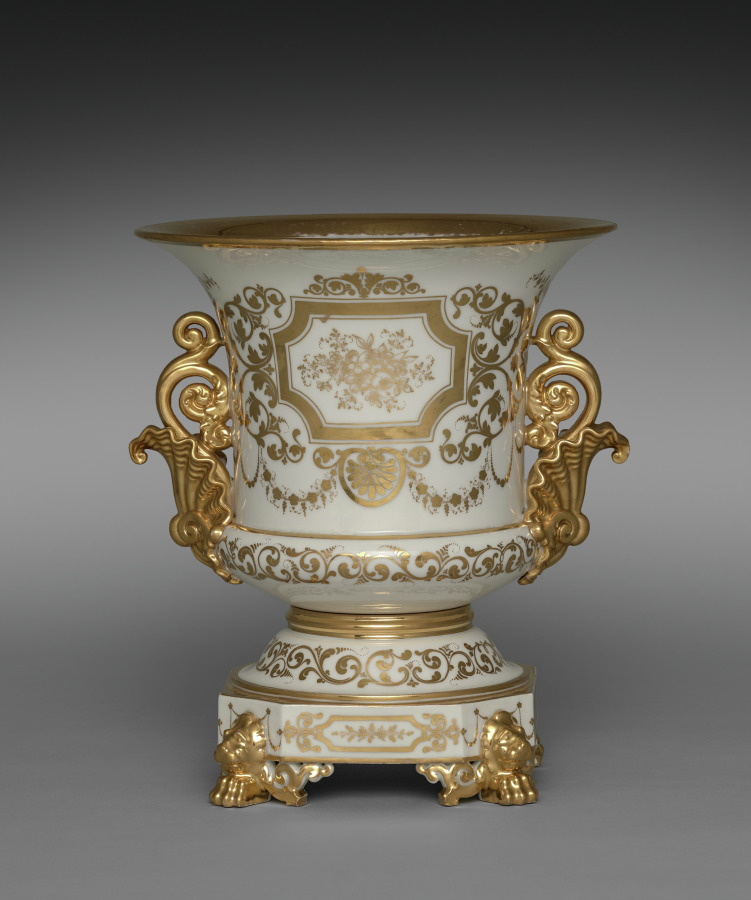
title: Ice Cream Pail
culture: France, Paris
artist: Factory of Jacob-Petit (French, 1830–1865)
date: c. 1840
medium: gilt porcelain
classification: Ceramic